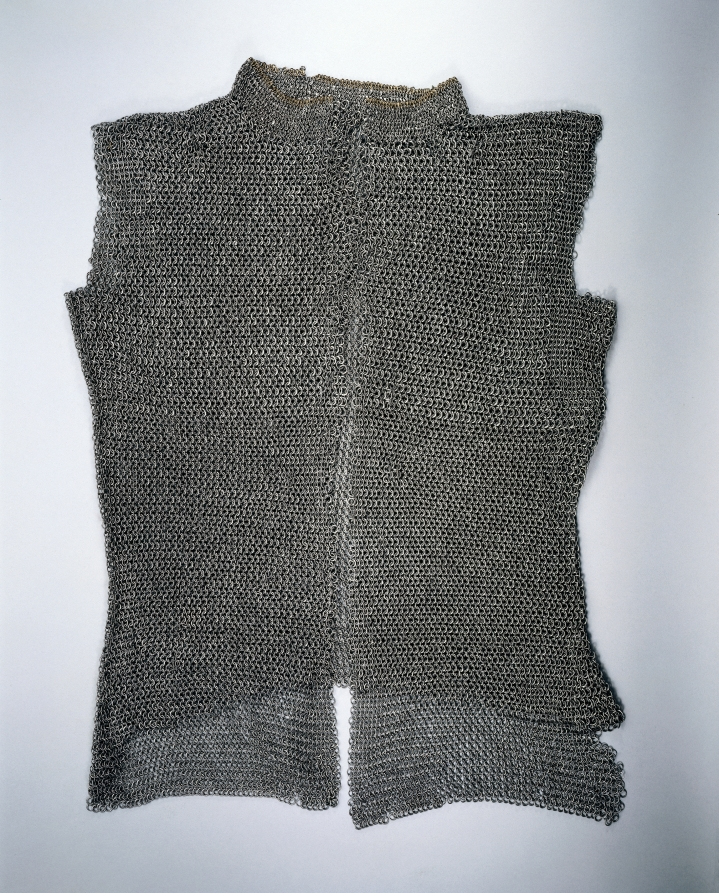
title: Hauberk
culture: European, 15th century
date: 1400s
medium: steel and brass rings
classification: Arms and Armor